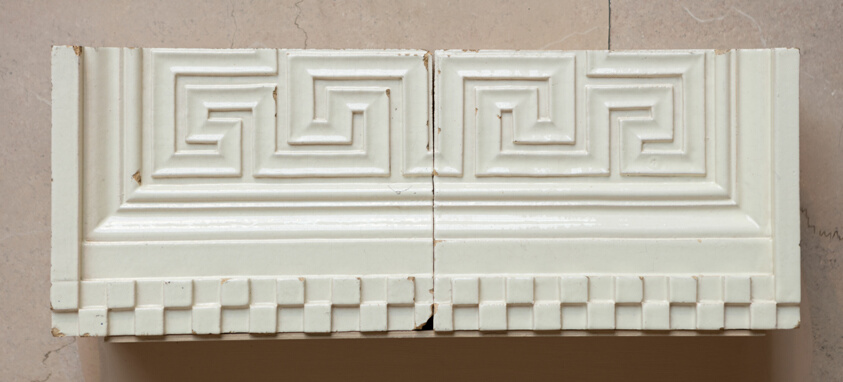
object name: Architectural fragment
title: Railway Exchange Building: Blocks with Repeated Meander Pattern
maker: D. H. Burnham & Co.; American, 1891-1912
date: 1903/04 (restored 1982)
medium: White glazed Terra-cotta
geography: Chicago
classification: earthenware; ceramics; architectural fragment; architecture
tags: Chicago